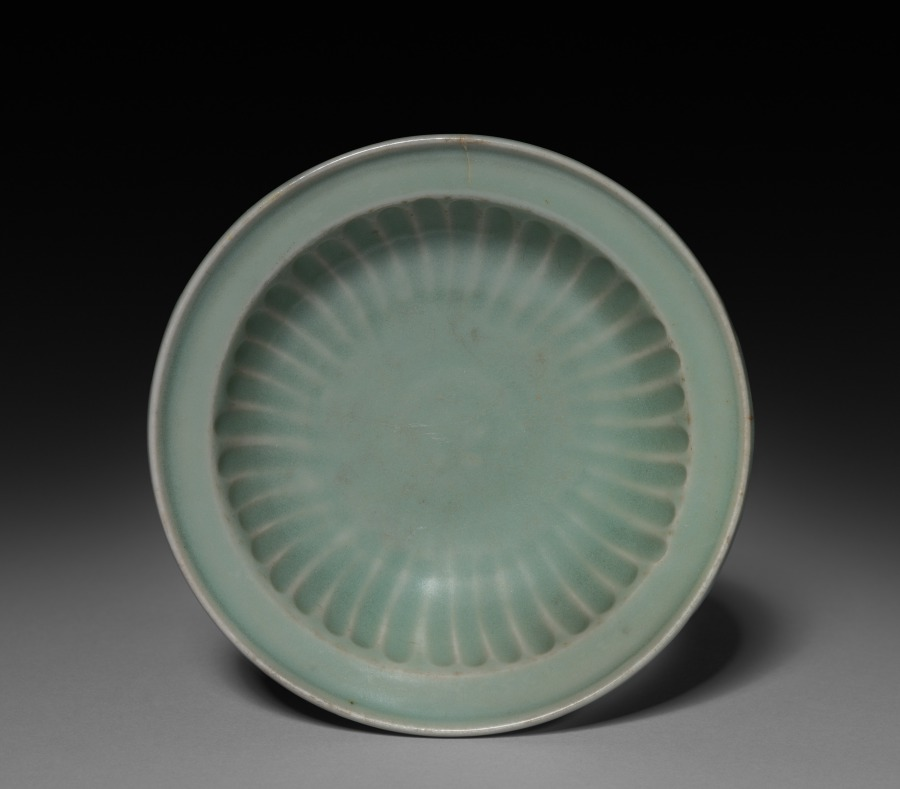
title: Plate: Longquan Ware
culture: China, Southern Song Dynasty (1127-1279) - Yuan Dynasty (1271-1368)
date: 1200s-1300s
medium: glazed porcelain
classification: Ceramic